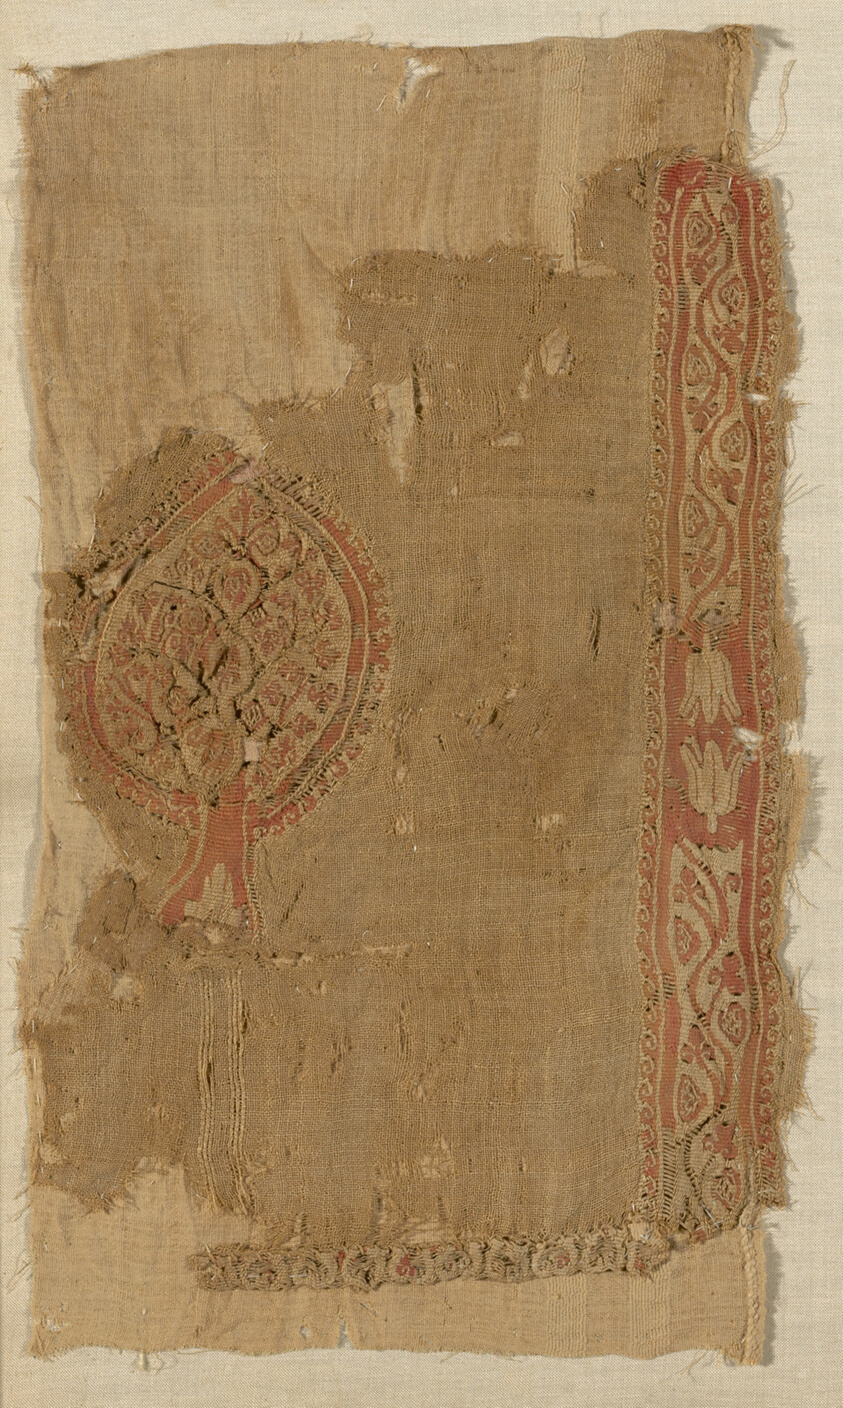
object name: Textile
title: Fragment (from a Tunic)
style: roman period (egyptian)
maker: Coptic (Egypt, Akhmin)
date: Roman period (30 B.C.– 641 A.D.), 5th/6th century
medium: Linen and wool, slit tapestry weave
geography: Egypt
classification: textile; weaving